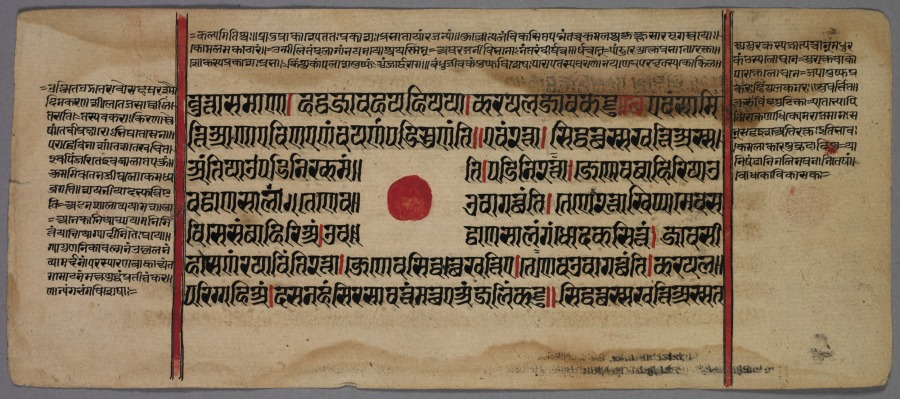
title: Leaf from a Jaina Manuscript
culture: India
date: 1400s–1500s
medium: ink on paper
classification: Manuscript